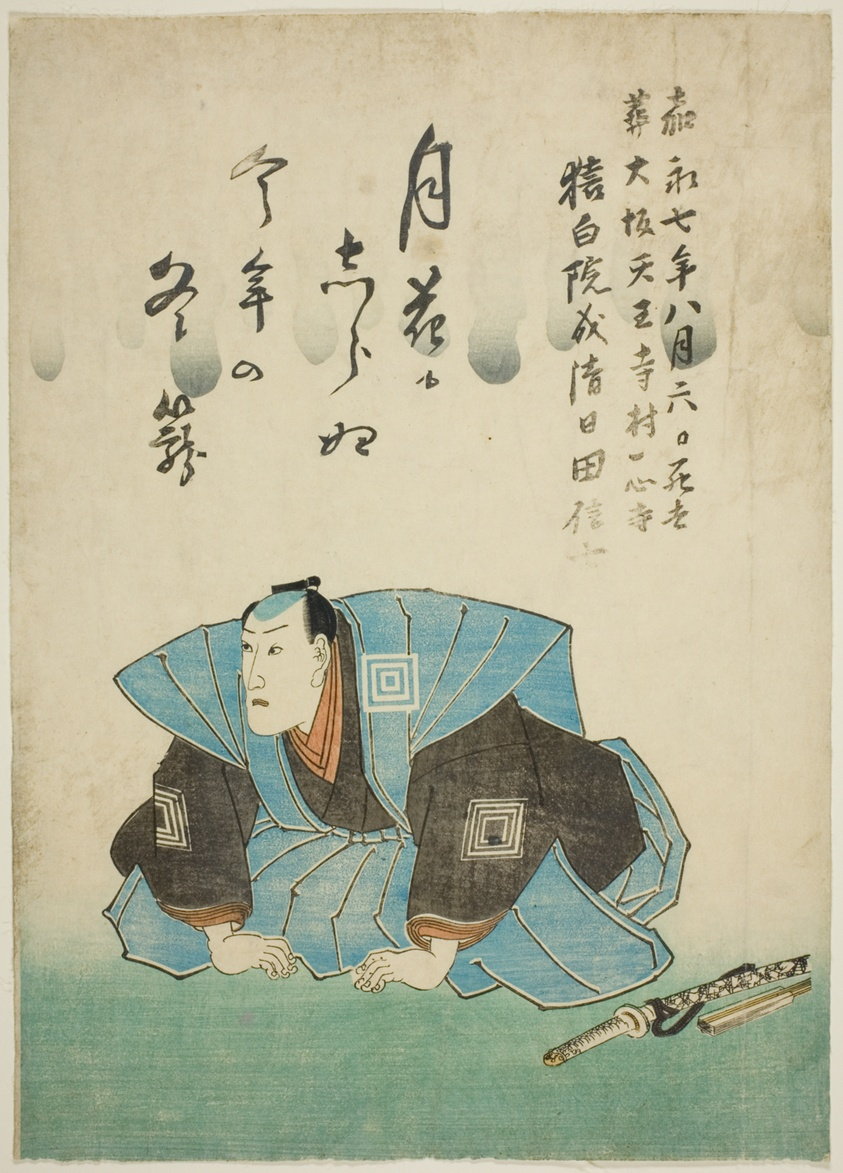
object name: Print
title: Memorial Portrait of the Actor Ichikawa Danjuro VIII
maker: Utagawa School (Japanese, 19th century)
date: 1854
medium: Color woodblock print; oban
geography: Japan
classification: print; asian art